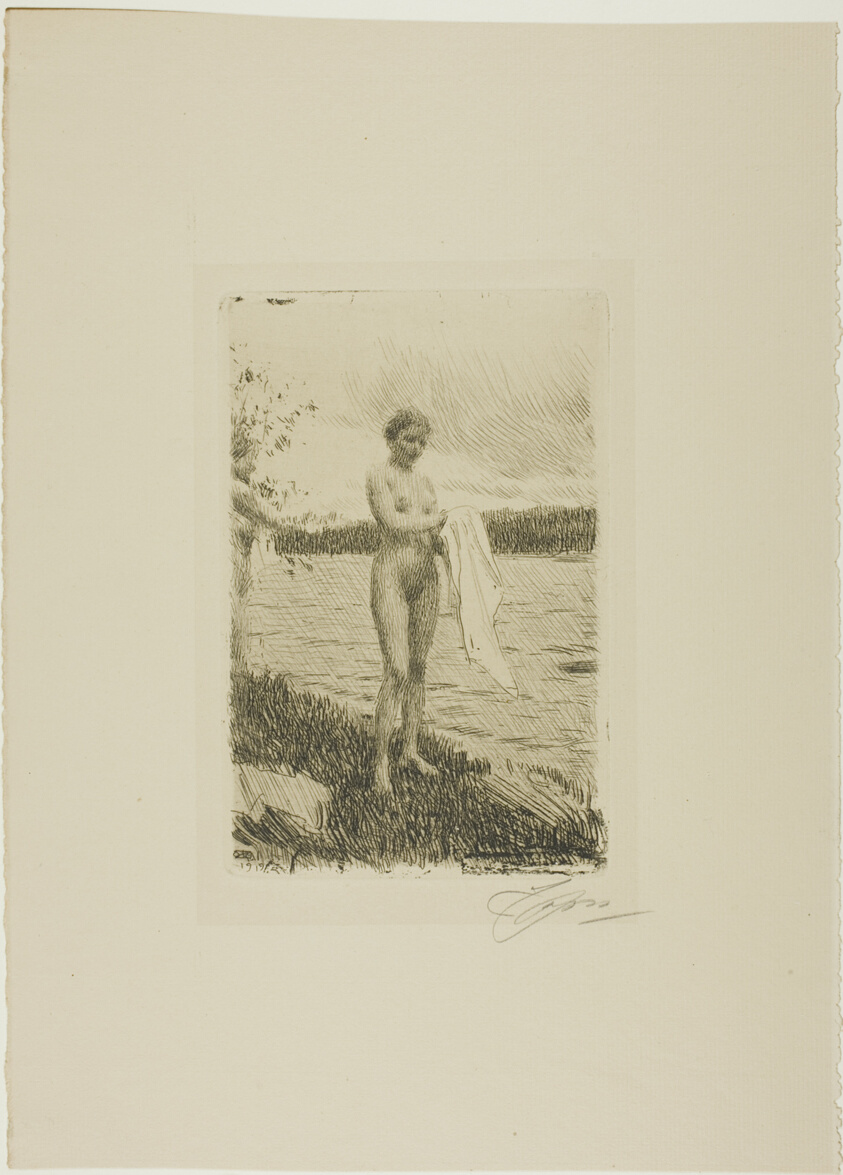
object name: Print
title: Dal River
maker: Anders Zorn (Swedish, 1860-1920)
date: 1919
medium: Etching on buff laid paper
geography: Sweden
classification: etching; print; prints and drawing